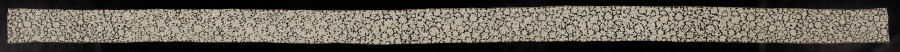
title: Lace Bed Valance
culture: Italy, Venice, 1660-1699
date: 1660–1699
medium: Needle lace (Venetian Raised Point)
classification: Lace